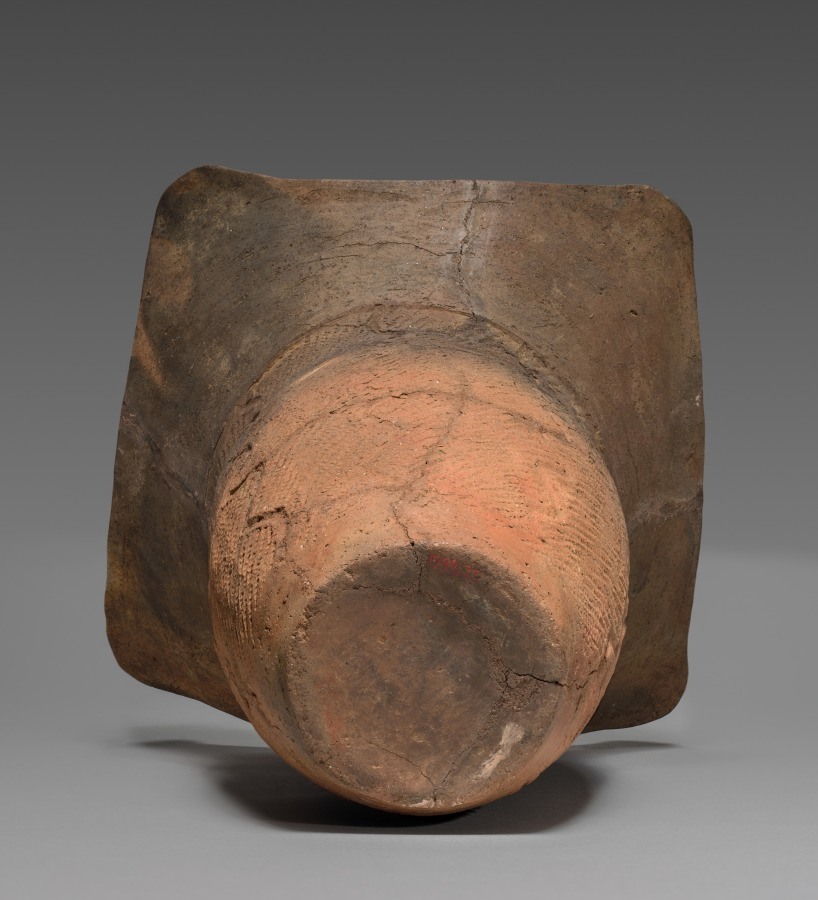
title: Deep Vessel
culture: Japan, Jōmon period (c. 10,500–300 BCE)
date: c. 2500 BCE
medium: Earthenware with impressed and carved decoration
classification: Ceramic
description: This cooking vessel was formed by piling coils of clay atop one another, smoothing and thinning the walls, and then adding surface decoration. Vertical incised squiggle lines as well as diagonal impressed cord patterns create texture. The mouth rises in four dramatic triangular forms, each with a coiled design inside.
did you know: Jōmon, impressed rope patterns, are typical of vessels of this era, so archaeologists named the period after them.